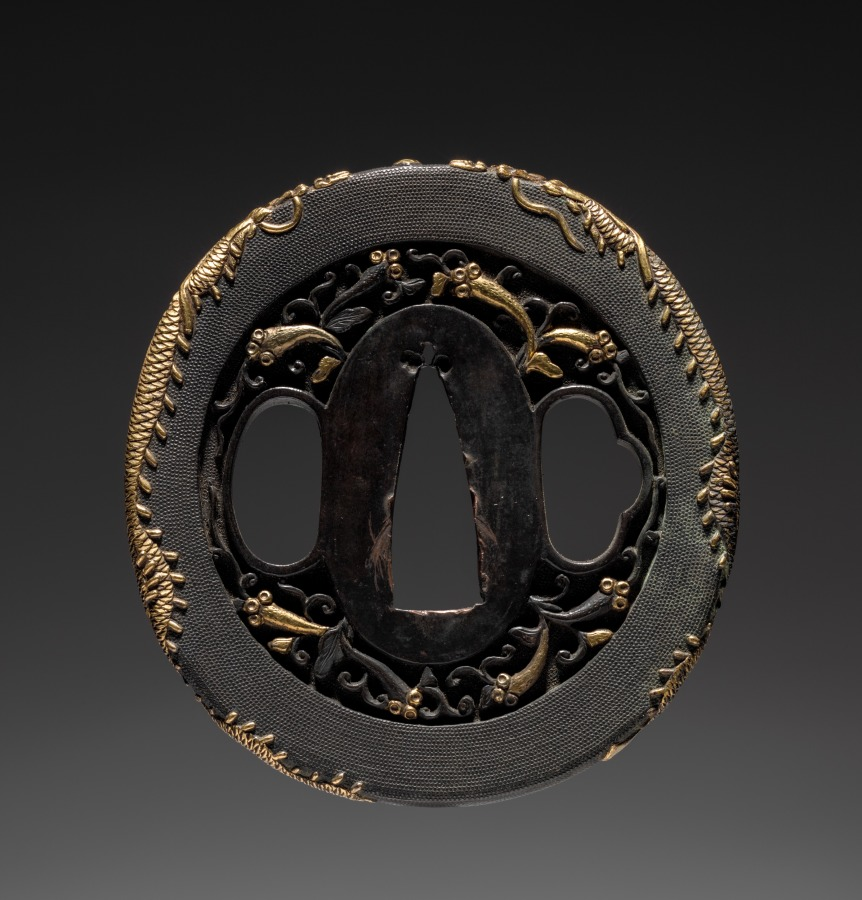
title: Sword Guard (Tsuba)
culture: Japan, possibly Edo period (1615–1868)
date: c. 1615–1868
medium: metal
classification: Arms and Armor